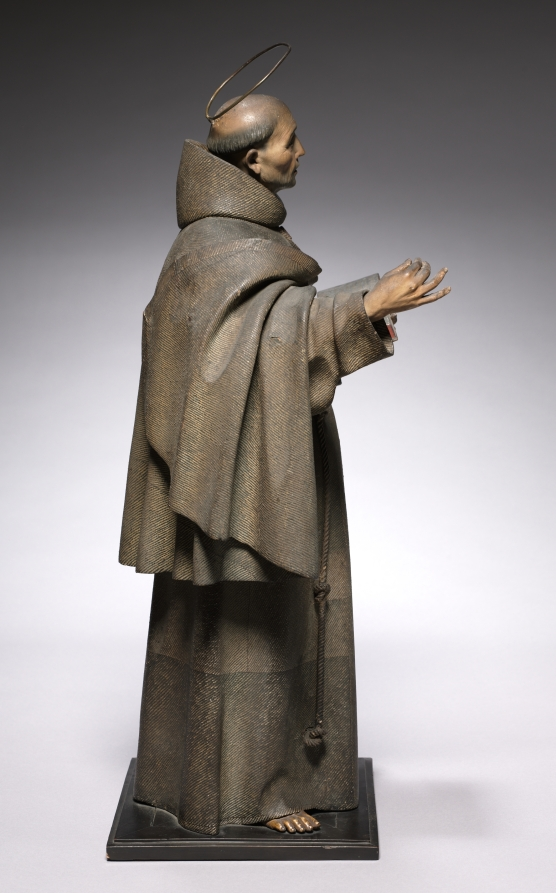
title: Saint Peter of Alcántara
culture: Spain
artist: Pedro de Mena (Spanish, 1628–1688)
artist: and Workshop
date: c. 1663–70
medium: painted wood, with ivory and glass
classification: Sculpture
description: Painted wood sculpture from Spain in the 1600s involved a team of artisans working under a lead sculptor. The sculptor first carved numerous pieces of wood in complex forms. So the paint would stick properly, these fragments were delicately covered in gesso (a combination of white chalk and glue made from animal collagen), preserving the subtle woodcarving underneath. The rough surface of the saint's face—reflecting his age and hardships—came from texturing the gesso with a brush. The glass eyes, probably imported from Venice, were inserted from behind the face before the wood pieces were attached. Finally, the eyelashes were added for a further touch of realism. A painter created the appearance of coarse sackcloth in a distinctive style, with yellow strokes rising off the surface. Smoother brushstrokes form the flesh tones, even revealing the saint's five-o'clock shadow. Unlike other kinds of painting, sculpture from southern Spain at this time was usually not covered in varnish; sculptors prized the unvarnished paint for its realistic effect, although it makes the surface exceptionally delicate and susceptible to dust and dirt, which more easily sticks to the surface.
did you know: Peter of Alcantara was so dedicated to his work he slept only 90 minutes a night--he's the patron saint of night watchmen!